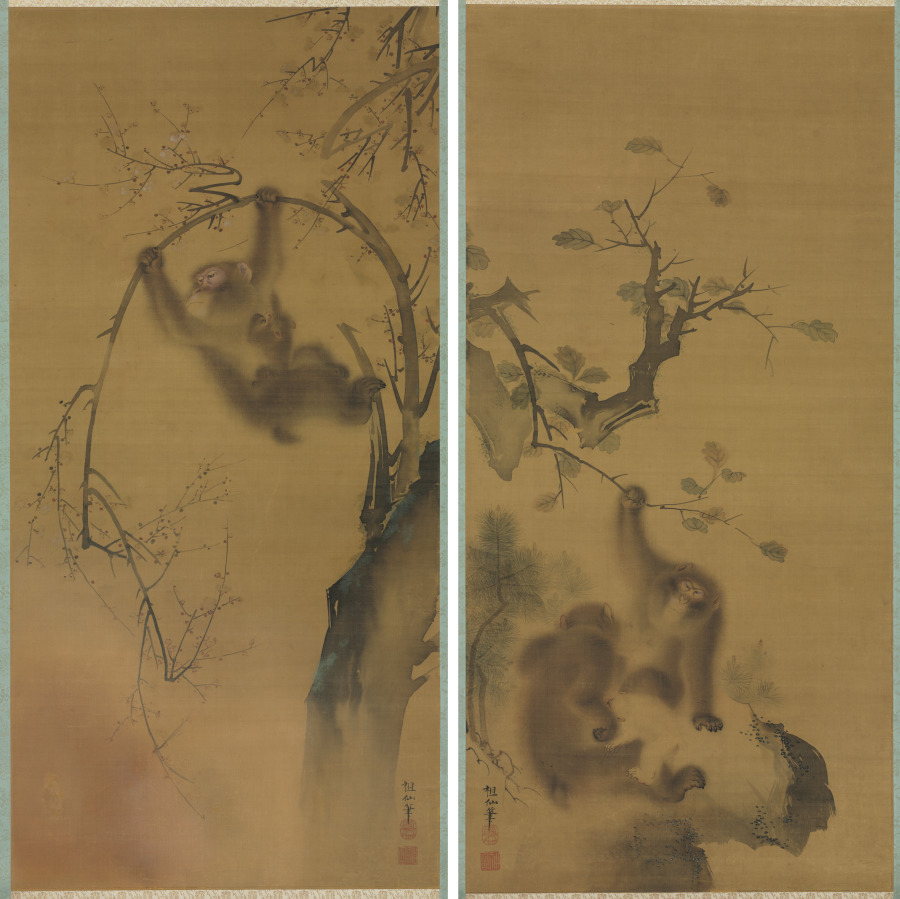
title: Monkeys in a Cherry Tree; Monkeys on a Rock Ledge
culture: Japan, Edo period (1615–1868)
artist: Mori Sosen (Japanese, 1747–1821)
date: c. 1800–1821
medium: hanging scroll, mounted and framed, ink and color on silk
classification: Painting